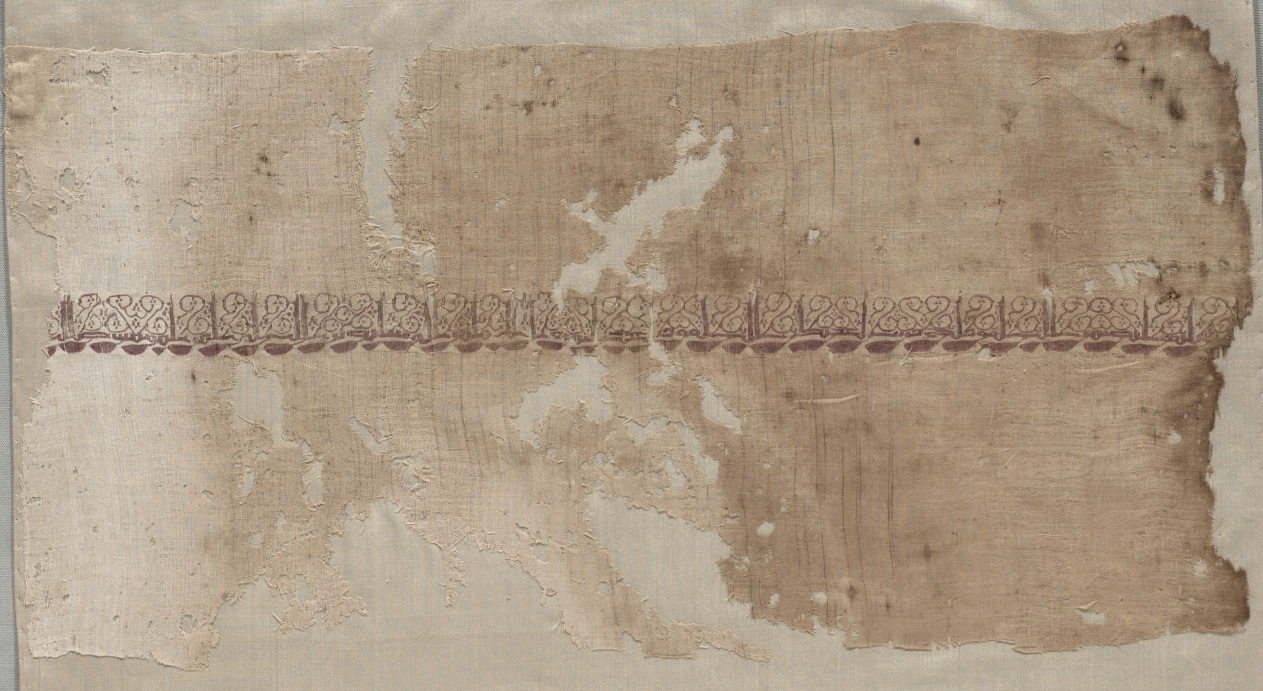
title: Fragment of a Tiraz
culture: Egypt, Fatimid period, Reign of Caliphate al-Mustansir, c. AH 427-436 (AD 1036-1044)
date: 1036 – 1044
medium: tabby ground with inwoven tapestry ornament; linen and silk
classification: Textile